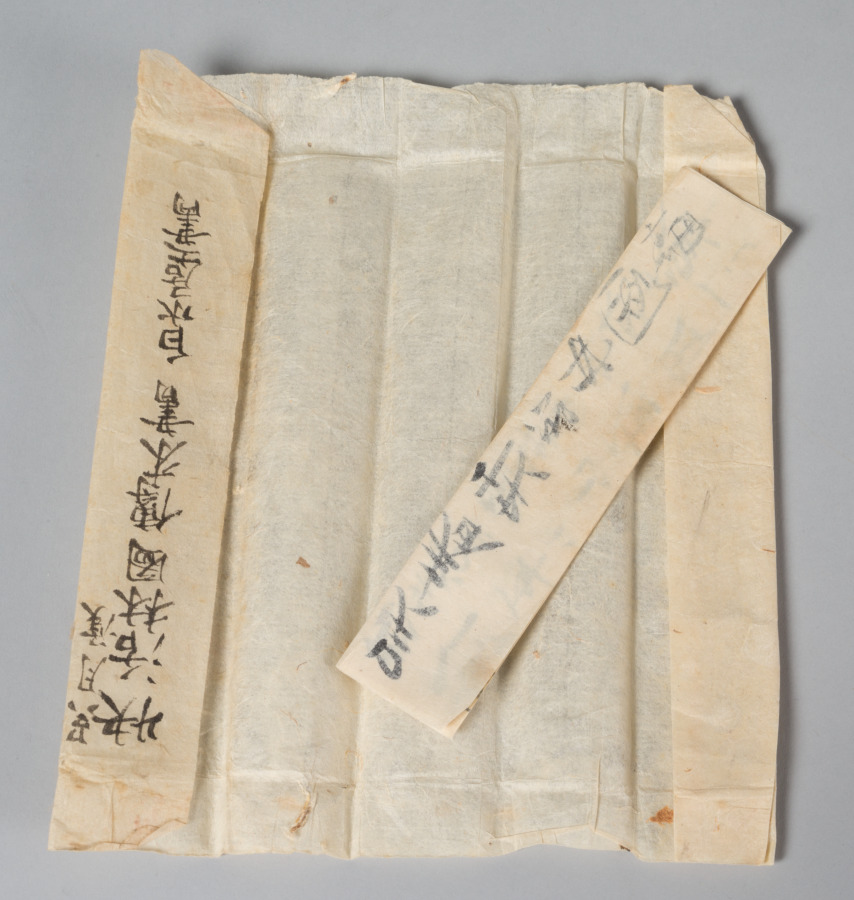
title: Happy Forest, from Water Margin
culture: Japan, Edo period (1615–1868)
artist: Matsumura Goshun (Japanese, 1752–1811)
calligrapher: and Amenomori Shōteki (Japanese, 1731–1786)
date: late 1700s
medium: hanging scroll; ink and color on paper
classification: Painting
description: The Chinese literary classic Water Margin is set in the 1120s and tells the story of 108 outlaws who first rebel against the government and then join forces with it. This painting depicts an episode in which hero Wu Song reclaims the tavern Happy Forest for its rightful owner, the prison warden’s son, Shi En. To prepare for the fight, Wu Song drinks a lot of wine. The painting was inscribed with a quote in which an ally describes Wu Song’s fighting style. It reads as follows: Where his twin fists rise, clouds and thunder roar, When his flying kick comes, wind and rain tremble.